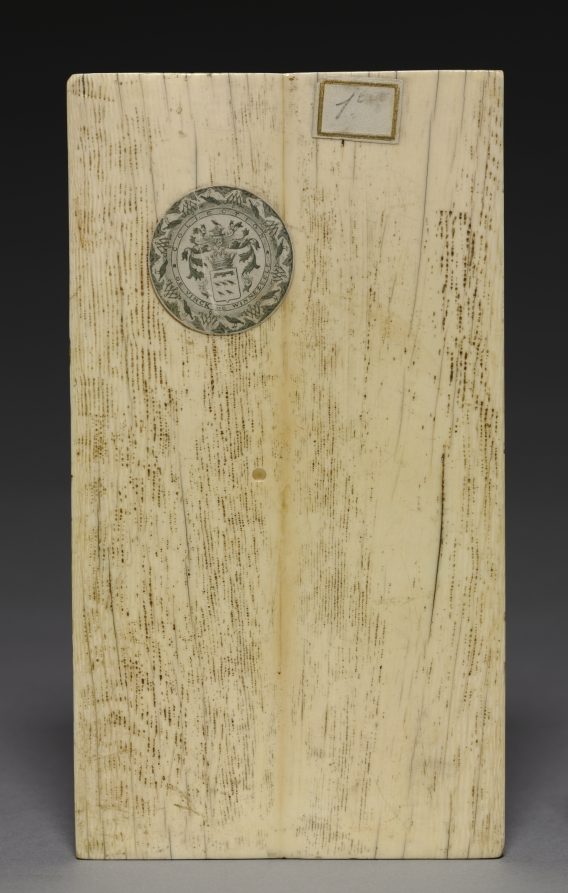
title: Diptych with Scenes from the Life of Christ (right wing: Entry into Jerusalem and Entombment)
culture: Germany, Thuringia or Saxony, 14th century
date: c. 1350–1375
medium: ivory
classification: Ivory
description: Ivory diptychs (two panels hinged together) were used for private devotion by their aristocratic owners. The scenes represented here are Christ’s Entry into Jerusalem, the Raising of Lazarus, the Crucifixion, and Christ’s Entombment. They suggest choices made by the original owner who wished to contemplate these aspects of Christ’s passion.